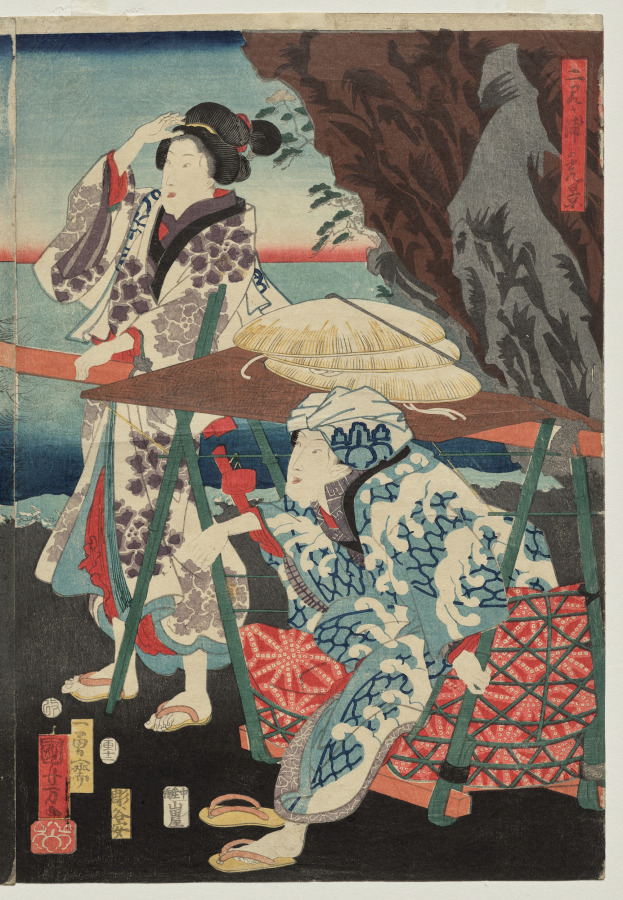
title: Splendid View at Futamigaura Bay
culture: Japan, Edo period (1615–1868)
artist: Utagawa Kuniyoshi (Japanese, 1797–1861)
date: 1854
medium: Right print from a triptych of color woodblock prints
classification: Print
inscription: Signature: Ichiyusai Kuniyoshi ga. Artist Seal: Paulownia. Publisher: Yamadaya Shohei (Nakabashi, emblem). Engraver: Hori Taniyasu. Censorship Seal: aratame.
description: This is one of three prints forming a continuous scene of figures visiting Futamigaura Bay near Ise Grand Shrine, one of Japan’s most sacred places. In the background, the sun rises between the “Wedded Rocks” joined by a twisted rope, called a shimenawa, used to designate a sanctified space. The rocks mark the entrance to Futami Okitama Shrine and are said to be embodiments of Izanagi and Izanami, the gods who, according to myth, created Japan. Futamigaura was a place where pilgrims purified themselves before visiting Ise and often lodged afterwards.